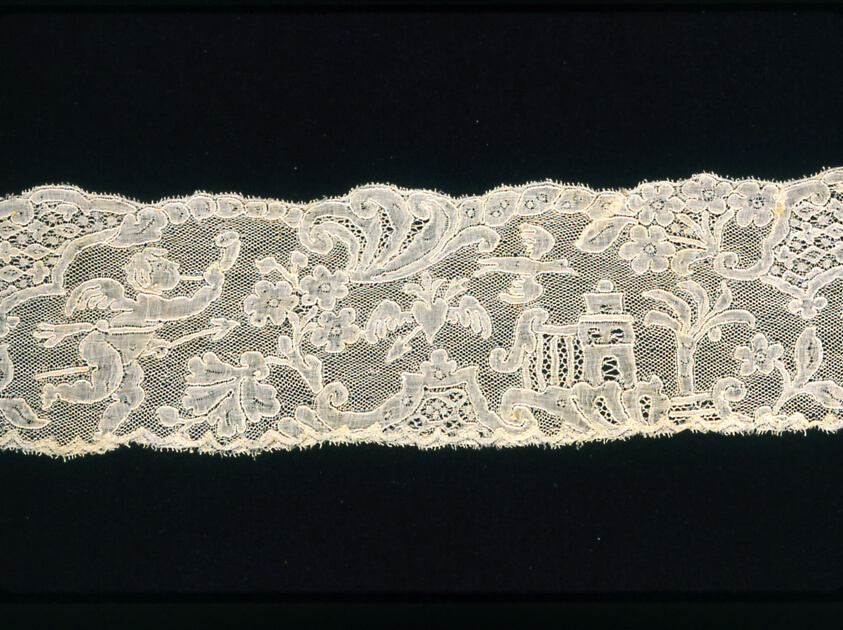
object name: Textile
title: Border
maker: Belgium, Flanders, Mechlin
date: 1750s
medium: Linen, bobbin straight lace of a type known as "Mechlin" with a Mechlin mesh ground(probably 18th century)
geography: Mechelen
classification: textile; lace - bobbin